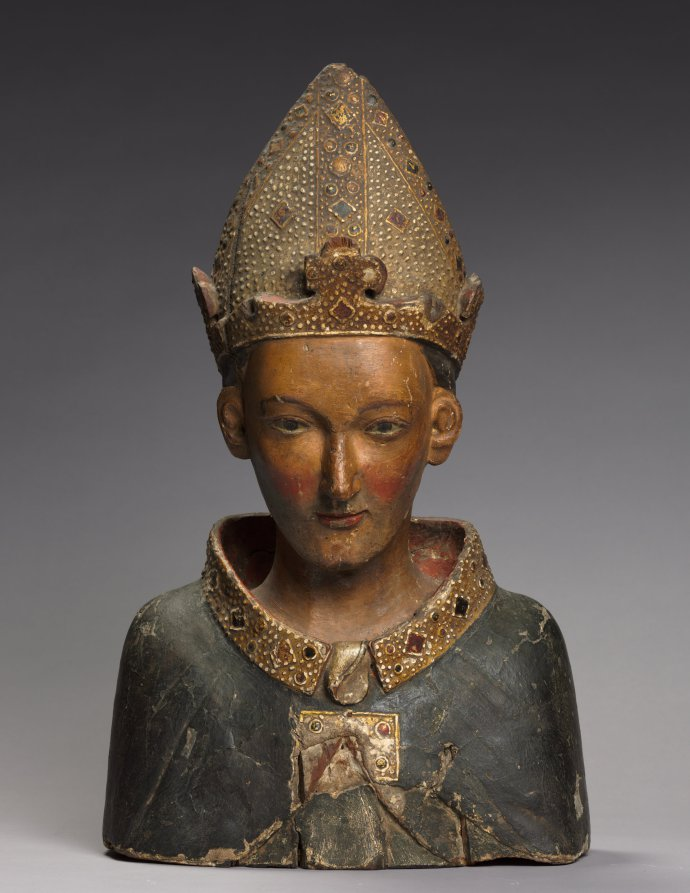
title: Bust Reliquary of St. Louis, Bishop of Toulouse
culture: Italy, Tuscany, Siena(?)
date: late 1300s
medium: wood (walnut) with polychromy, gesso and gilding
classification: Sculpture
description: This reliquary bust was probably made to house a relic of Saint Louis, Bishop of Toulouse (1274–97), second son of Charles II of Anjou, King of Naples (1288–1309). Renowned for his works of charity, he was made bishop in 1297 and died shortly after at the age of 23. He was canonized in 1317, and his cult of veneration spread rapidly in Italy and Spain. In art, Louis is generally represented as a "boy" bishop without a beard and with youthful features. The relic (now lost) would have been enshrined within. On feast days the reliquary would have likely been carried in procession and otherwise placed in a church sanctuary or on a side altar for the veneration of the faithful. Relics were the physical remains of the saints, chiefly their bodies. The living venerated the relics of the saints in order to seek their patronage, which in turn provided a proximate link to the divine ruler. The power of the saints was therefore manifested by and through their relics, or objects that were owned or touched by them. Medieval pilgrims, in a world fraught with peril, sought close physical contact with relics, which protected both the spiritual and temporal welfare of laypeople and religious communities.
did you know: This small bust was hewn out of wood, but painted realistically. Its life-like accuracy gave the medieval worshipper the sense that they were in the presence of the beloved bishop Saint Toulouse.